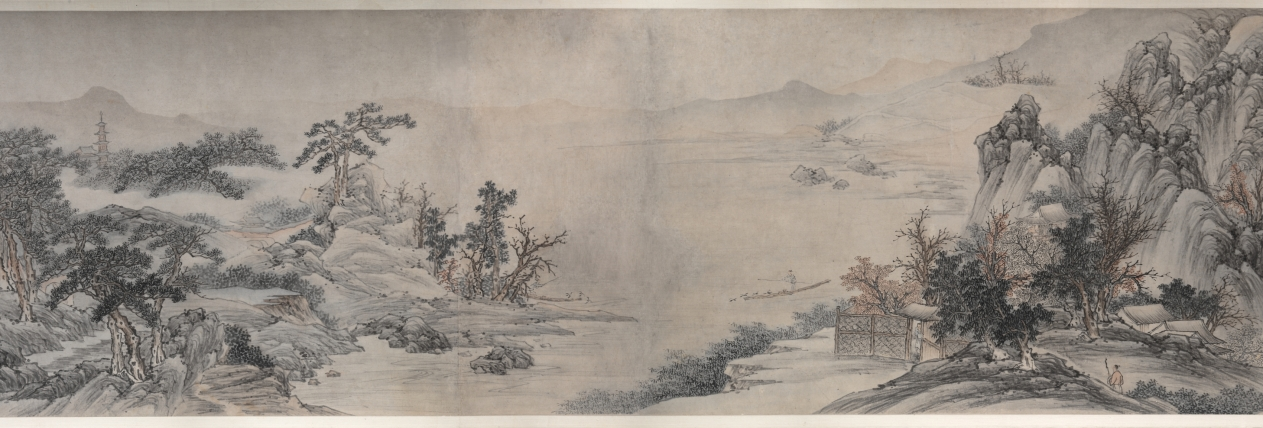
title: Autumn Mist in the Countryside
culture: China, Qing dynasty (1644-1911)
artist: Zou Zhe (Chinese, c. 1610-before 1688)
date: 1647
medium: handscroll, ink and color on paper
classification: Painting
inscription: Artist's inscription, signature, and seal: The first day of the sixth lunar month, the ting-hai year [1647], Tsou Che painted [this]. [seal] Fang-lu.